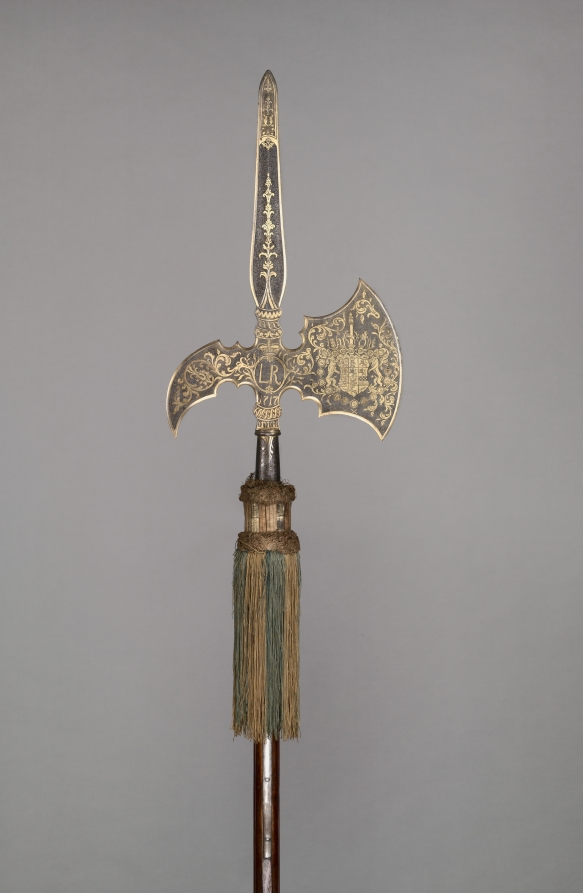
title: Parade Halberd (from the bodyguard of Ludwig Rudolf, Duke of Brunswick- Wolfenbüttel [1671-1735])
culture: Germany, 18th century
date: 1717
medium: blued, etched and gilded steel, wooden haft with orginal steel base spike, silk tassel with alternating blue and gold bands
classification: Arms and Armor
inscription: 'LR'; 1717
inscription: Coat of Arms Brunswick-Wofenbüttel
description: The halberd and partisan are hafted weapons highly favored by European infantries of the 1500s and 1600s for their great versatility and deadly effect. From about 1550 on, these weapons underwent significant changes as they gradually became more ornamental. The large flat surfaces of the blades lent themselves to engraving, etching, gilding, and other forms of decoration. They also provided the perfect location for the coats of arms of princely or noble families. For this reason, hafted weapons became the favored parade weapons of palace guards and splendidly outfitted special regiments of princely bodyguards. These examples, made for the German dukes of Brunswick at Schloss Blankenburg, still have their silk tassels in their original colors of blue and yellow.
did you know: A halberd is a mix between a battle ax and a spear.